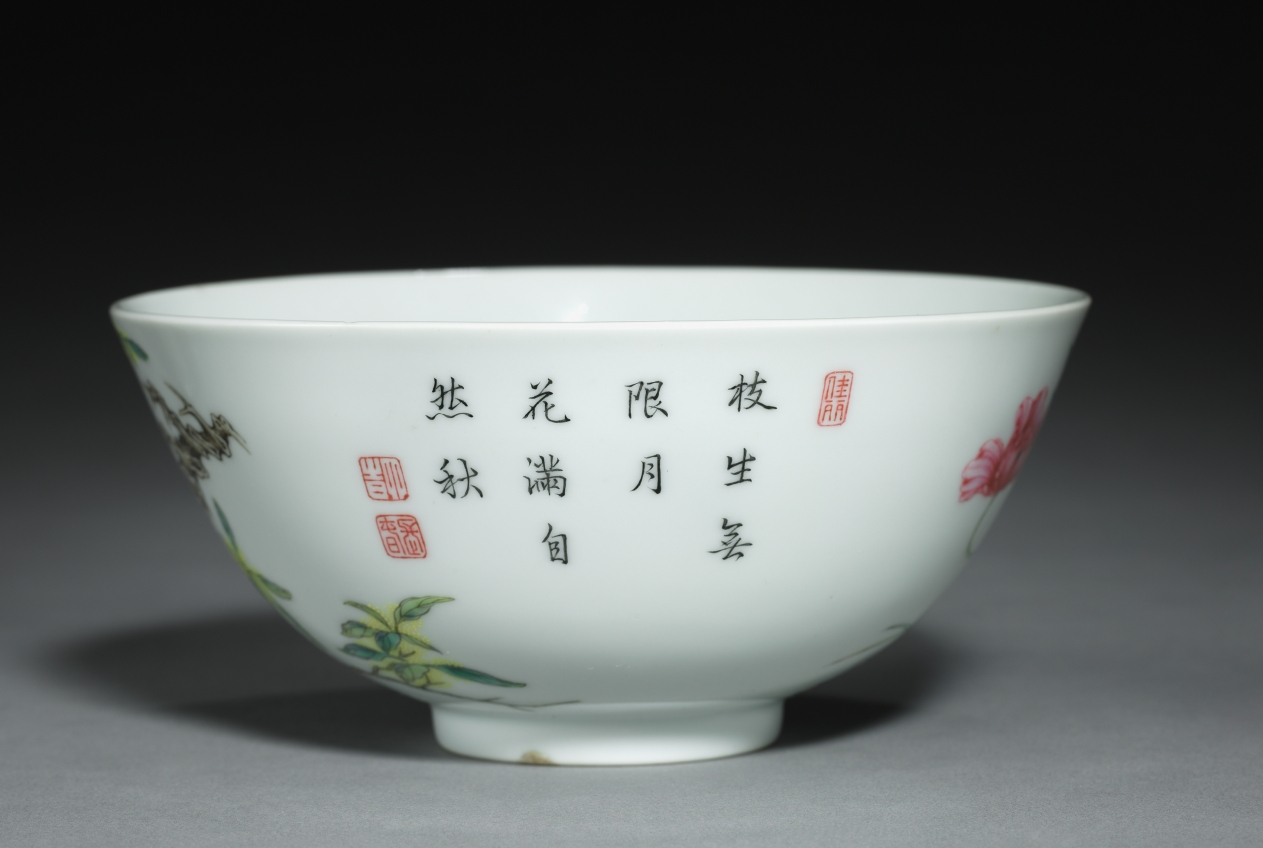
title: Bowl with Poppies, Tree Peony, and Flowering Mimosa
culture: China, Jiangxi province, Jingdezhen, Qing dynasty (1644-1911), Yongzheng mark and reign (1723-1735)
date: 1723–35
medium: porcelain with overglaze enamel decoration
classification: Ceramic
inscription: 大清雍正年制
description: Developments in enamel technology led to new possibilities in polychrome decoration. Pinks appeared, lending their name to the new palette of overglaze colors (famille rose), and the addition of opaque white allowed painters to vary the value of pigments, enhancing the painterly quality of porcelain decoration. As on painted scrolls and album leaves, the image is accompanied with a poem, in this case: "Branches come alive in the moonlight; Blossoms fill the autumn realms."